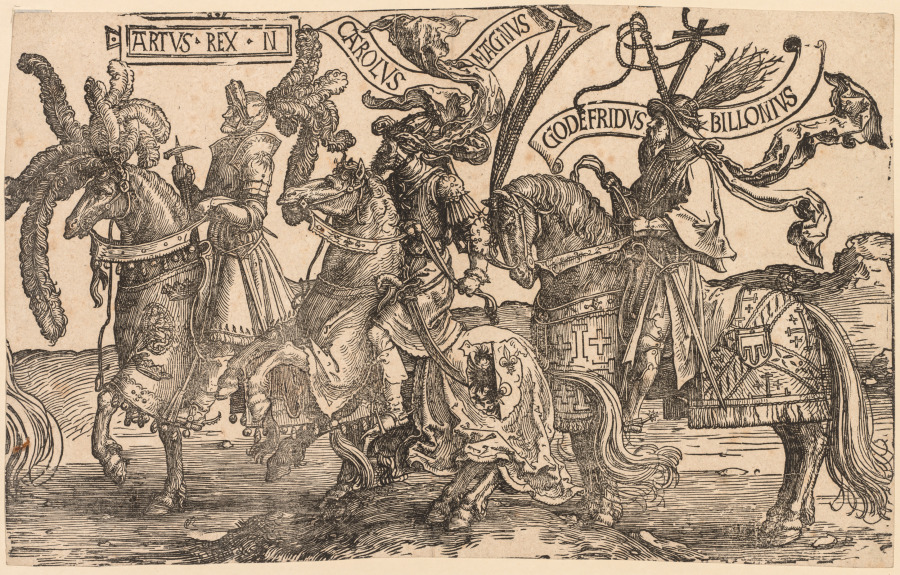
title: The Nine Heroes: Arthur, Charles the Great (Charlemagne), Godfrey of Bouillon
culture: Netherlands, 15th century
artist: Lucas van Leyden (Netherlandish, 1494–about 1533)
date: 1515–1517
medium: woodcut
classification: Print